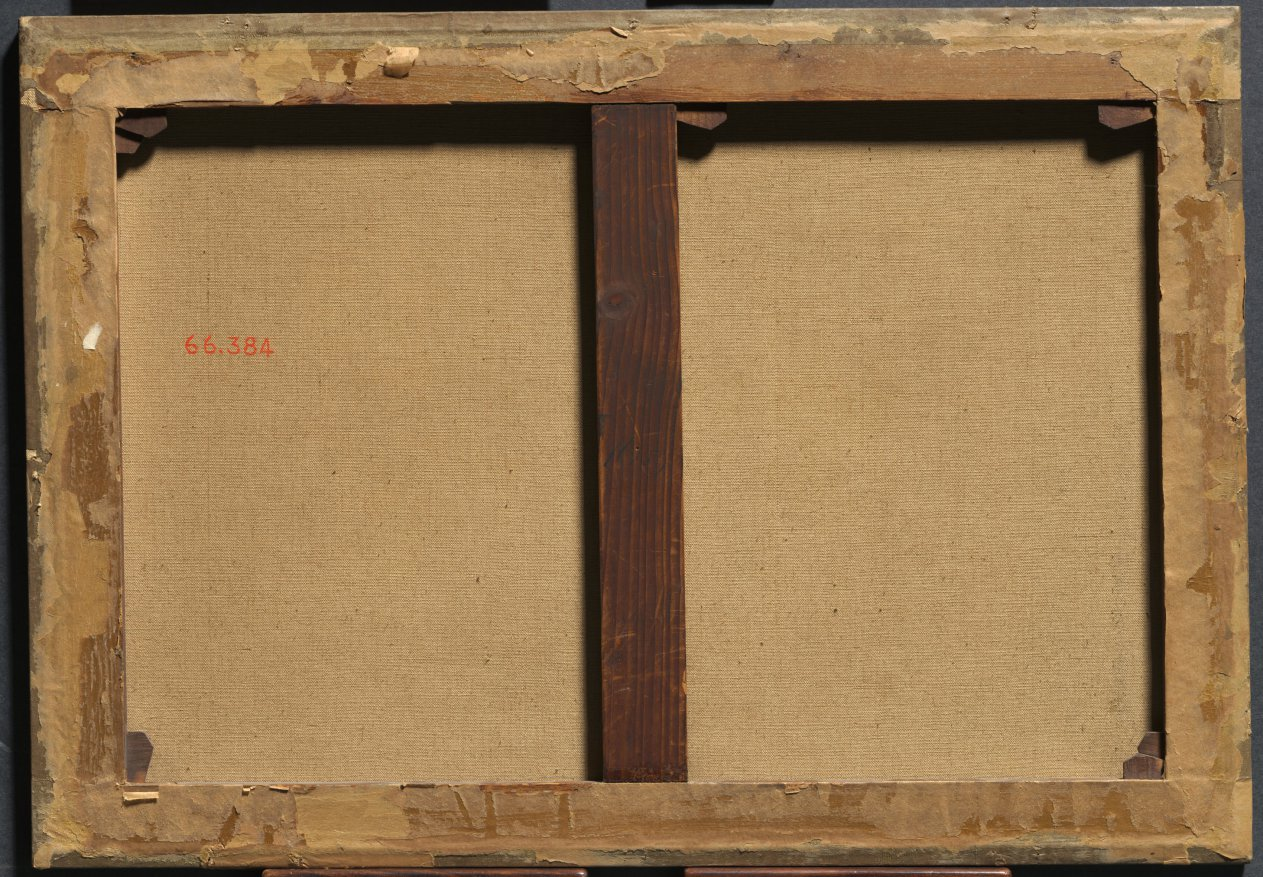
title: Landscape with a Peasant and His Flock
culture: Netherlands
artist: Alexander Joseph Daiwaille (Dutch, 1818–1888)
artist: and Eugène Joseph Verboeckhoven (Belgian, 1798–1881)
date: c. 1850–59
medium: oil on fabric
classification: Painting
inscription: Signed lower right: A. J. Daiwaille [in reddish-brown paint] / Eugène Verboeckhoven animaux [in black paint]